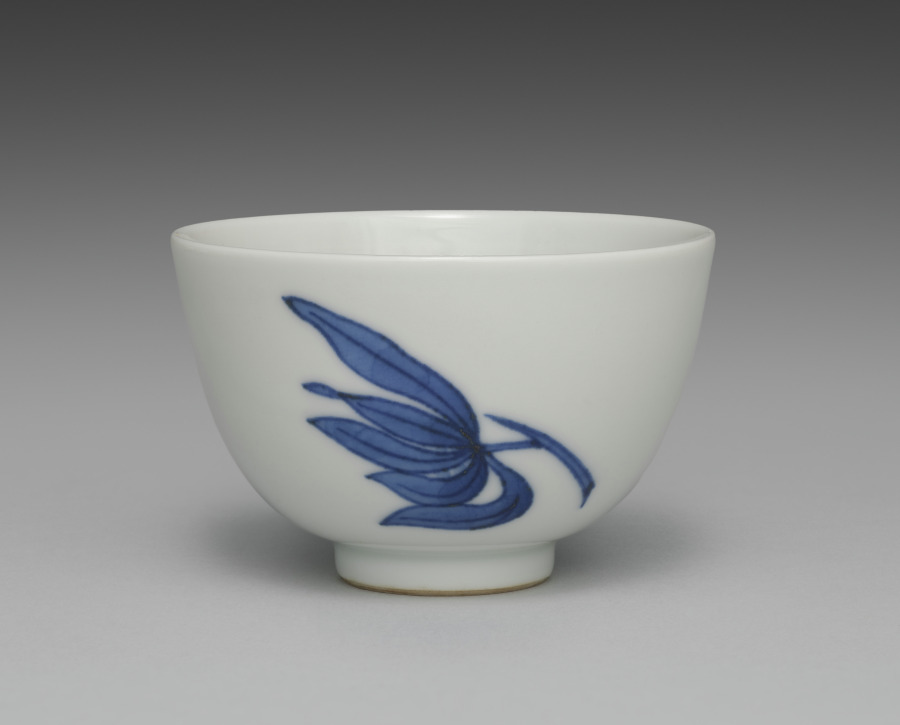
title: Teacup from Tea Set with Orchids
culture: Japan, Meiji period (1868–1912)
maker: Seifū Yohei III (Japanese, 1851–1914)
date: c. 1893–1914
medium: Porcelain with underglaze blue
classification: Ceramic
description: Although the teapot here is stored in a separate box from the five cups, these six pieces may once have been part of a tea set that included other tools such as a water cooler. The teacups have orchid flowers on both sides in underglaze blue, as well as a blue band inside the footring. The teapot has the same design and a blue band painted around the bottom of the lid’s knob. The cups’ long wood storage box is stamped on the exterior, over the lid and base, with a small red seal reading “Satō.” The same seal appears on five small squares of yellow textile, one placed in the bottom of each compartment in the teacup storage box. These are additional to the customary yellow cloths stamped with a “Seifu” seal. Interestingly, four of the Seifū cloths are stamped with an ovoid seal, while the remaining cloth, which is a slightly lighter color, has an unusual seal that is not quite gourd-shaped and with the fū of Seifū in a stylized, unrecognizable form. The teapot has its own box with a Satō seal and is wrapped with an orange textile stamped with the same unusual Seifū seal. A set with a very similar surface design is in the Brooklyn Museum. The Brooklyn set has a water cooler and a small pitcher, in addition to the teapot and cups, and all are in a single storage box. This box records the tea tools as made with kanpakuji, or “bright-jewel white porcelain,” counted among Yohei III’s most important inventions, and carved images. In fact, both sets have a white surface much closer in coloration to the cool white of porcelain clay used in Kyoto at the time, and the designs are simply painted. The Brooklyn set was thus likely mismatched at some point with a box intended for another tea set. Nonetheless, the box may have helped prevent the set’s original components from being dispersed, and the set itself provides insight into how the other tools from the present set may have looked.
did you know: This tea set with orchids has a side-handled pot called a kyūsu, used for steeping, straining, and serving tea.